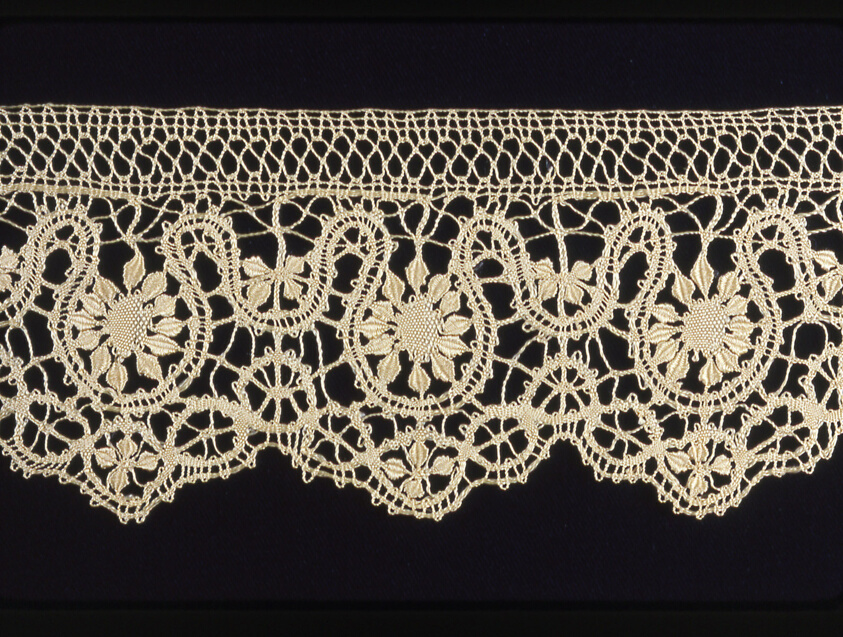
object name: Textile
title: Border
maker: Malta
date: 1850/1900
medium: Silk, bobbin straight lace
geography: Malta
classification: textile; lace - bobbin